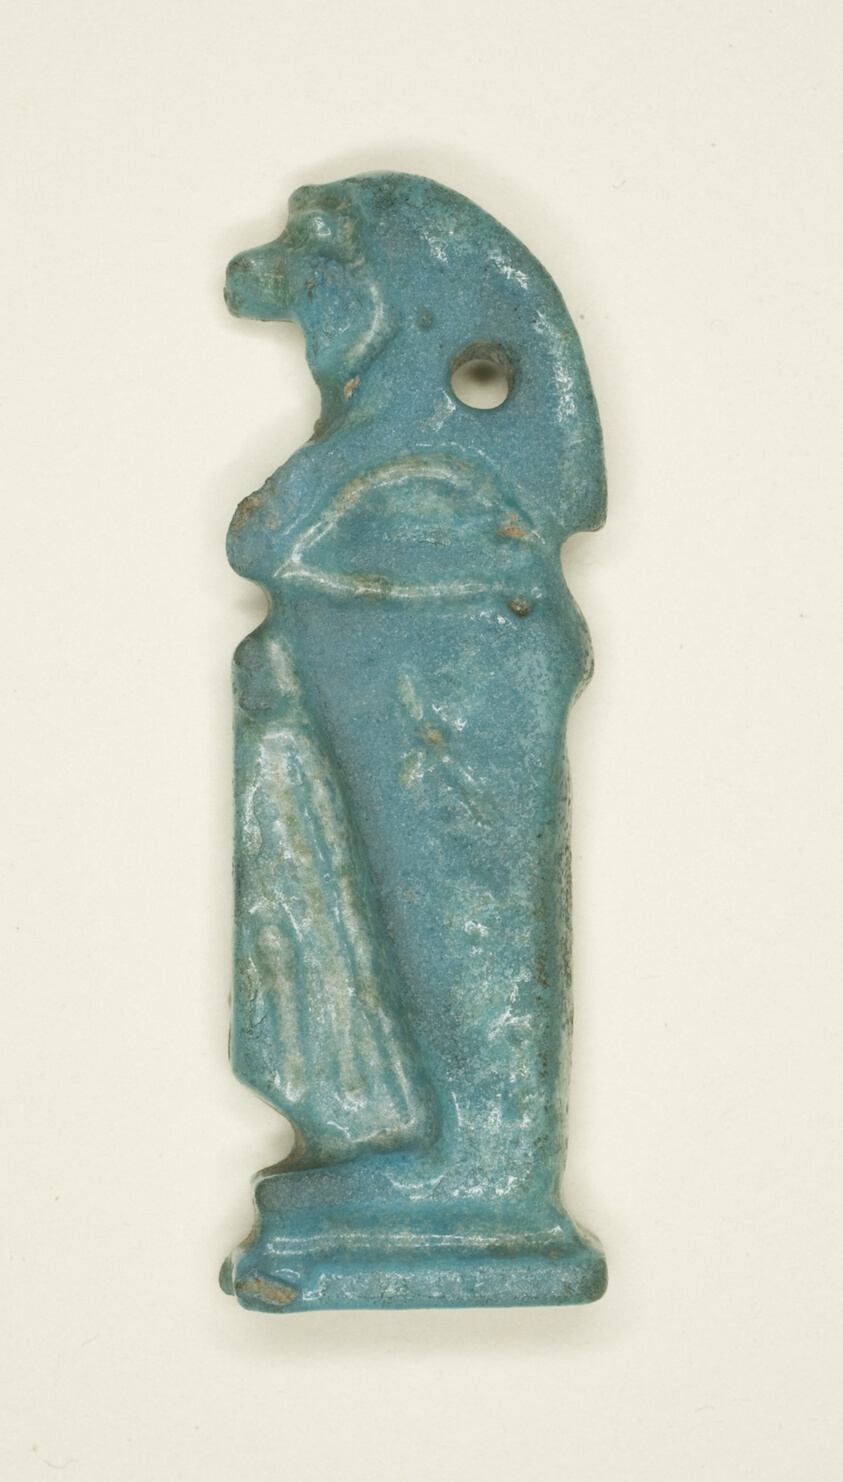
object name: Costume and Accessories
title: Amulet of the God Hapy (one of the four Sons of Horus)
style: third intermediate period, egyptian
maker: Egyptian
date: Third Intermediate Period, Dynasty 21–25 (1069–656 BCE)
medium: Faience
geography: Egypt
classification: amulet; jewelry; ceramics; ancient art; costume; faïence (composite material)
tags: gods (deities), mummies